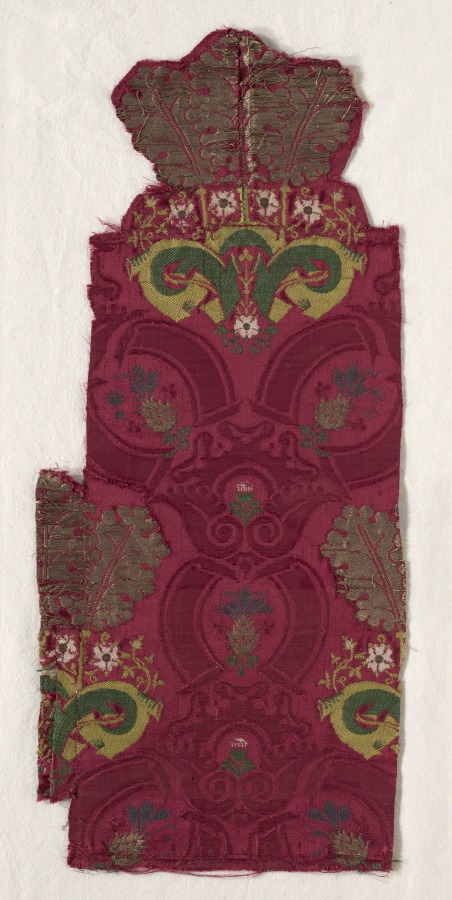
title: Fragments of Silk Textile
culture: Spain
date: 1700s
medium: plain cloth, brocaded; silk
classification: Textile